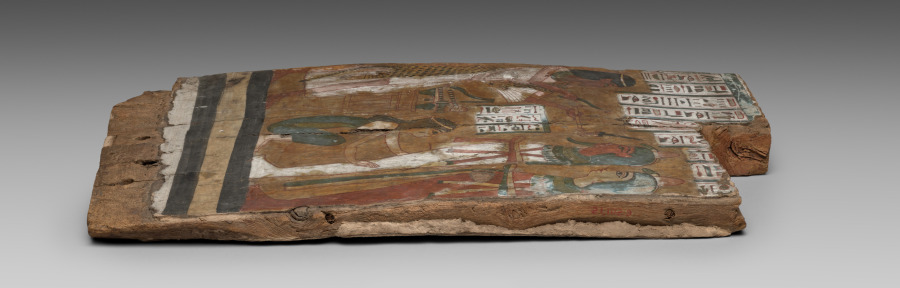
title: Side Panel from the Coffin of Amenemope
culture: Egypt, Thebes, Third Intermediate (1069–715 BCE), Dynasties 21–22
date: c. 976–889 BCE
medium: gessoed and painted sycamore fig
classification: Funerary Equipment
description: This panel illustrates one of the same scenes shown on the inside of Nesykhonsu’s coffin, allowing us to compare different artist’s styles. On the right stand the mummies of the priest Amenemope and his wife, Taditkhonsu. Their daughter, called "the lady of the house, Mutemperes," crouches before them with her hands wrapped around Amenenope’s legs in a traditional gesture of mourning. On the left, a priest, dressed in his finest linen garments and panther skin, holds in his upraised hands an incense burner and a curious curved implement typically associated with the "opening of the mouth" ritual, in which the mummy’s mouth was magically opened so that the deceased person could take in food and thus be brought back to life.